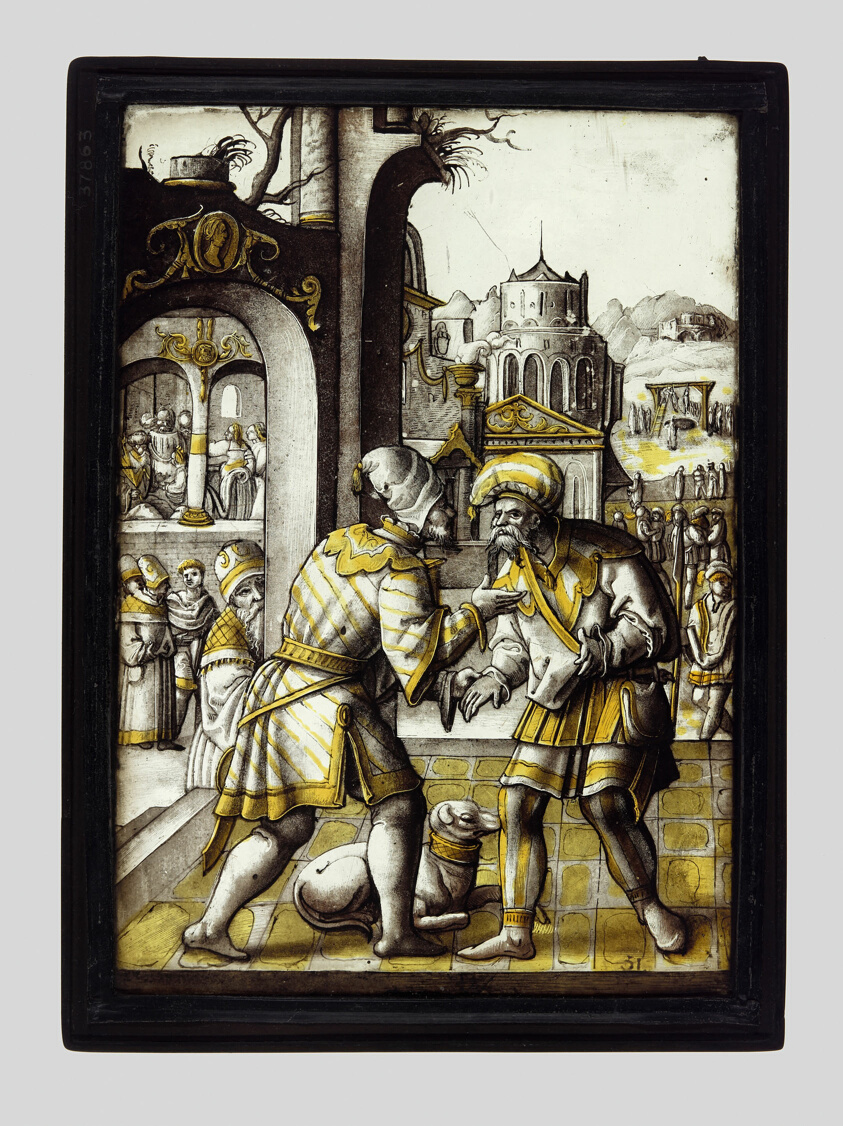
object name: Glass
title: Mordechai Overhears the Conspiracy from the Story of Esther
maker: Circle of Pieter Cornelisz (1498/90 - 1560/61) or Lucas van Leyden (1489-1533); Northern Netherlandish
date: c. 1525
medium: Glass, paint, silver stain, lead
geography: Netherlands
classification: stained glass/leaded glass; glass; european decorative arts; decorative arts